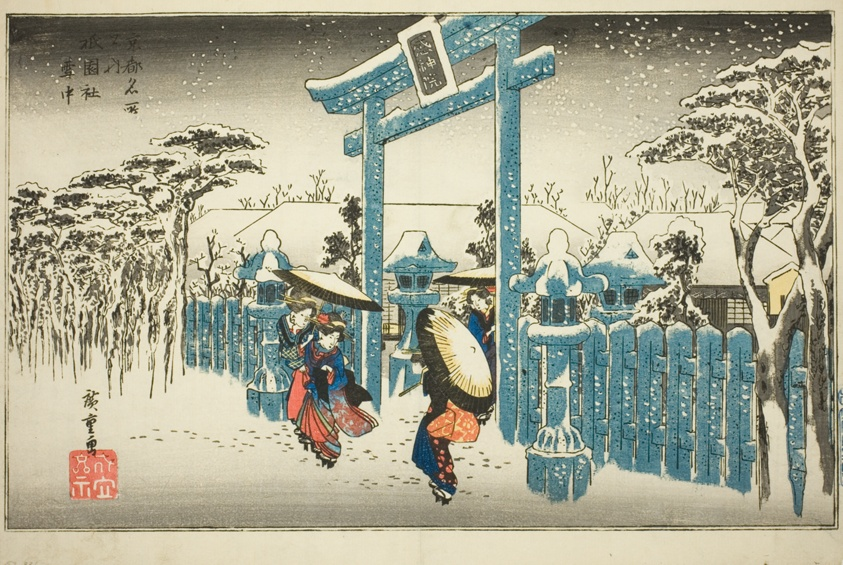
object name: Print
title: The Gion Shrine in Snow (Gionsha setchu), from the series "Famous Places in Kyoto (Kyoto meisho no uchi)"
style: Japanese (culture or style)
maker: Utagawa Hiroshige 歌川 広重; Japanese, 1797-1858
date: c. 1834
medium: Color woodblock print; oban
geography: Japan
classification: woodblock print; print; asian art